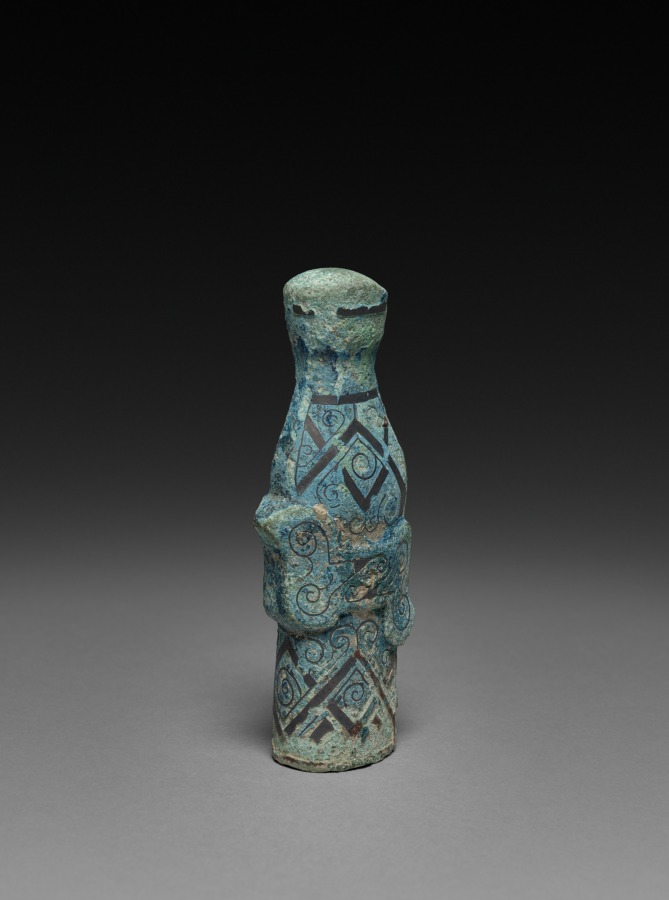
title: Halberd Standard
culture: China, Zhou dynasty (c. 1046–256 BCE)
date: c. 600–221 BCE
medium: bronze inlaid with silver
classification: Metalwork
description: This finial, being pear-shaped in section, is known to have been the handle of a halberd. Its ornament consists of broad bands intersecting to make angles, and of delicate lines ending in whorls. The asymmetrical part through the middle is derived from a bird, its head being at the upper right, its tail at the lower left. The whole object is coated with a green and blue patina of rare beauty.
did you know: The craftsman used silver inlay to create an eminently satisfying pattern of dashing straight lines and restless curves.